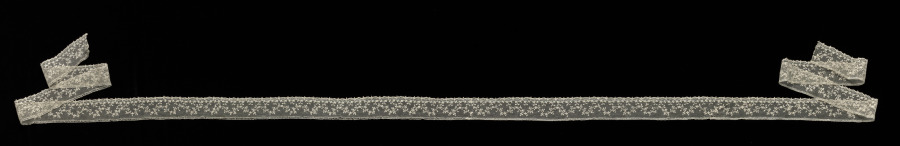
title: Lace Edging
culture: France, Argentan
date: 1715–74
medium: Linen: needle lace (Point de Argentan)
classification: Lace